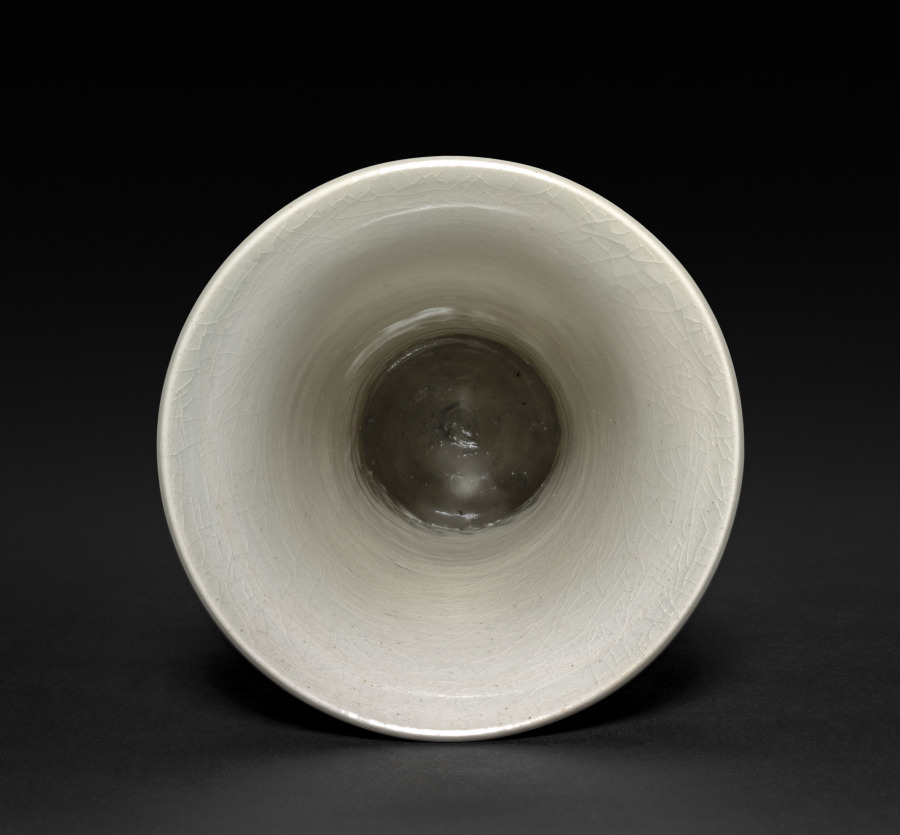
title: Gu-shaped Vase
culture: Japan, Meiji period (1868–1912)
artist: Seifū Yohei III (Japanese, 1851–1914)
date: 1912–14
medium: Porcelain with crackled glaze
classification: Ceramic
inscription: 清風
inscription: 清風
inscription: 帝室技芸員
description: Seifū Yohei III mined the repertoire of Chinese vessel types, from ceramics modeled after ancient ritual bronzes to shapes developed in the Yuan (1279–1368) and Ming (1368–1644) dynasties. His designs tended to be formal and restrained, often featuring creamy white glazes suggestive of the hue of Ding ware and green glazes resembling Longquan ware. This gu-shaped vase has a cracked-ice glaze, which was once customarily called Ge (Japanese pronunciation Ka), after the kiln where it purportedly originated during the Southern Song dynasty (1127–1279). The glaze’s double-crackle pattern, featuring both deeper and shallower cracks, is called “gold threads and iron lines.” The effect was enhanced here by coating the vessel with ink or another stain, which was allowed to seep into the cracks before the surface was wiped clean.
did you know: Gu-shaped vases are relatively slender cylinders that flare at both the mouth and foot with orbs or drumlike forms partway up the vessel.